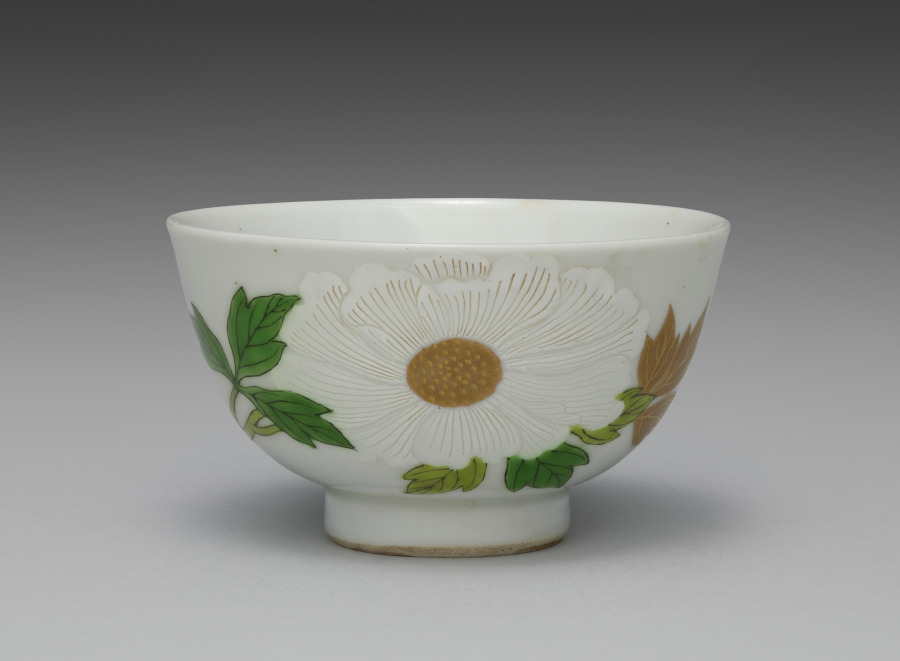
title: Teabowl from Teabowls with Peony and Crabapple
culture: Japan, Meiji period (1868–1912)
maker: Seifū Yohei III (Japanese, 1851–1914)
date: 1893–1914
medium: One from a set of five teabowls; porcelain with underglaze and overglaze color enamels and gold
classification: Ceramic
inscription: 清風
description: Overglaze color enamels are generally called iro-e (literally “color picture”) in the terminology customarily used for porcelain decoration of the Edo period. This set of teabowls is a fine example of Yohei III’s skilled use of the technique, which is identified on this set’s box lid with the alternate phrasing “porcelain with color painting” (jisaiga). Distinct from the way overglaze colors were used in Kakiemon ware from Arita, his designs and applications show a consciousness of porcelain decoration of the Qing dynasty. Here, he combines Chinese models with a sensibility taken from Kyoto ware precedents, including painting with powdered gold (kinrande). The colors used in the bowls are as follows: blue, black, gold, white, light green, green, and pink. The black iron, used for stems and leaf veins, is painted over the glaze. The gold, also painted over the glaze, is used for leaves and the centers of flowers, for solid, glossy lines defining detail, or as a semimatte ground. The white of the peony flower is built up to a low relief over the glaze. Yohei has incised lines of varying widths into the pigment, carving away to the bowl’s surface, to differentiate individual petals and their rippled shapes. The light and dark greens, as well as the pink, are painted over the glaze. Of note is how Yohei has first used thinly applied lines of light green to draw the plum branch before applying the opaque iron black. For the plum buds and flowers, he has used a diluted pink with an opaque pink for outline, both over the glaze. In his later works, Yohei used pink both over and under the glaze in a manner similar to underglaze blue, and it can be challenging in some cases to discern which technique he has used. A lidded container in a private collection has a similar design but is augmented with the inclusion of white and purple magnolia blossoms. In contemplating the original decorative program of a set, of which these teabowls may have been a part, it is worth considering that perhaps not all objects included the full range of motifs. In such cases, the composition of the individual object may be best understood within the context of the extended ensemble. Here, the delicate pink plum on one side of the bowl seems slightly unbalanced with the bold white peony on the other, but when seen with other objects with the magnolia and its additional colors and shapes, it is possible to imagine a set with a complex, balanced design across multiple pieces.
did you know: Blue appears only inside the footring, as a double band of underglaze color.